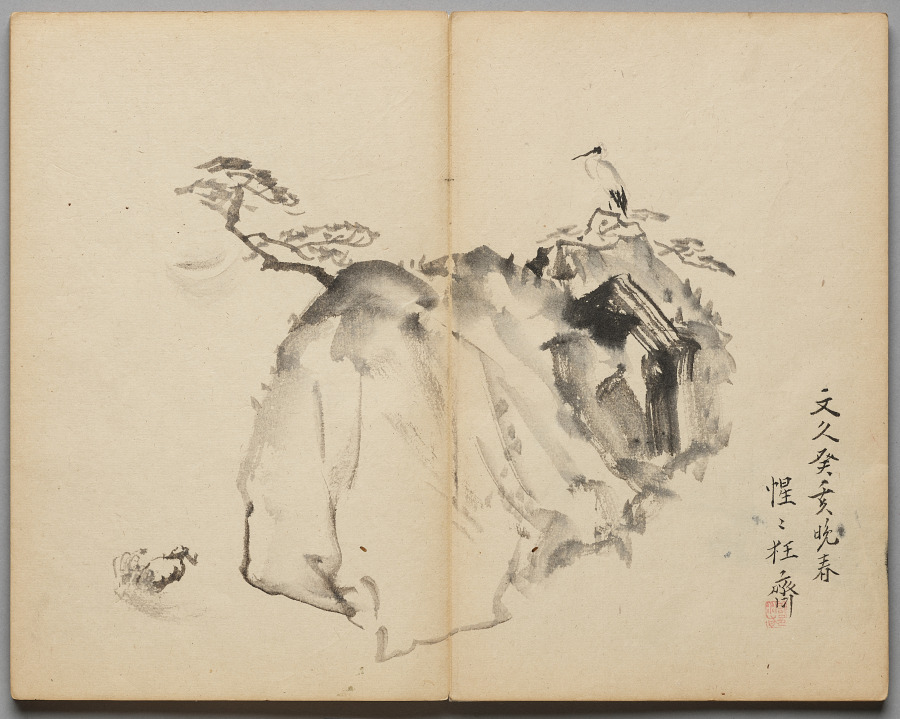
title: Cranes and Pines in Moonlight from Sketch Album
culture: Japan, Edo period (1615–1868) to Meiji period (1868–1912)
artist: Kawanabe Kyōsai (Japanese, 1831–1889)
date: mid- to late 1800s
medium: Accordion-style book of 26 double-leaves; ink and color on paper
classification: Bound Volume